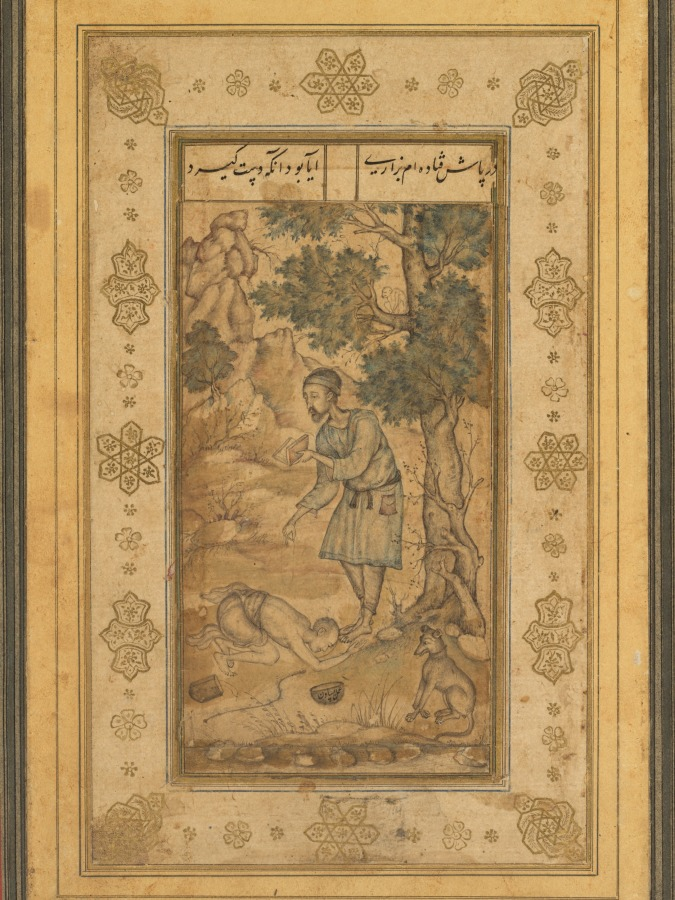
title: A mendicant bowing before a holy man, from the Prince Salim Album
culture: Mughal India, court of Akbar (reigned 1556–1605)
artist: Basavana (Indian, active c. 1560–1600)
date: c. 1585; inner border added in Allahabad c. 1602; outer border added probably 1900s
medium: Gum tempera, ink, and gold on paper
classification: Painting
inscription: Persian inscription on mendicant’s bowl, in nasta‘liq script: the work of Basavana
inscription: Persian verse at top from a ghazal (lyrical poem) of Hafiz (Persian, 1325–1389), in nasta‘liq script: I have fallen at his feet, grieving and wailing./ Could it be that I might receive a helping hand?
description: As the Mughal atelier grew into the 1580s, Indian artists become increasingly adept at incorporating Persian styles with a new dimensionality and naturalism that Akbar promoted, possibly based on his appreciation of European prints and paintings. Here, a sincere holy man wears robes tinged lightly with blue. He stands beneath a tree in the wilderness with a loyal jackal by his side. A devotee touches his head to his feet. The artist’s tiny signature is written on the alms bowl. Connoisseurs of Persian art in the Islamic world praised an artist’s virtuoso ability to work on a microscopic scale.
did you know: The dog stares hungrily at the mendicant’s alms bowl, with the artist’s signature.